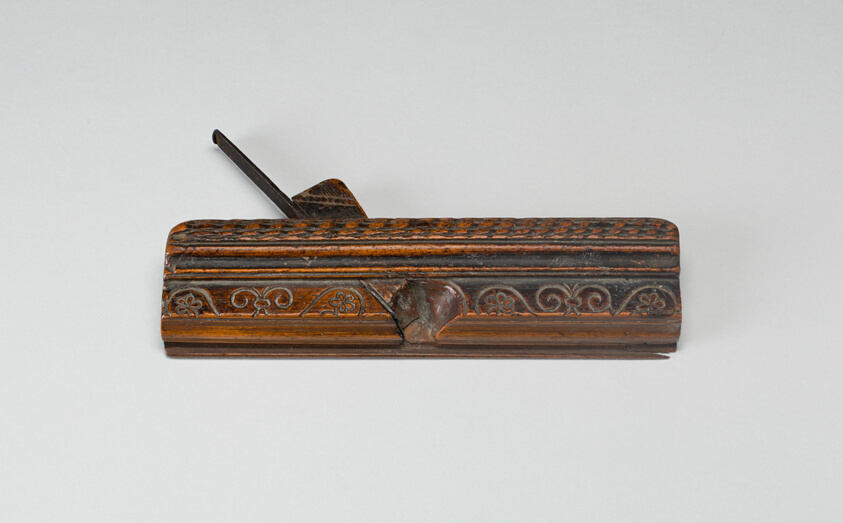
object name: Metalwork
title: Molding Plane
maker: Germany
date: 1691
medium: Carved wood, old iron knife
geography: Germany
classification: tool; european decorative arts; metalwork